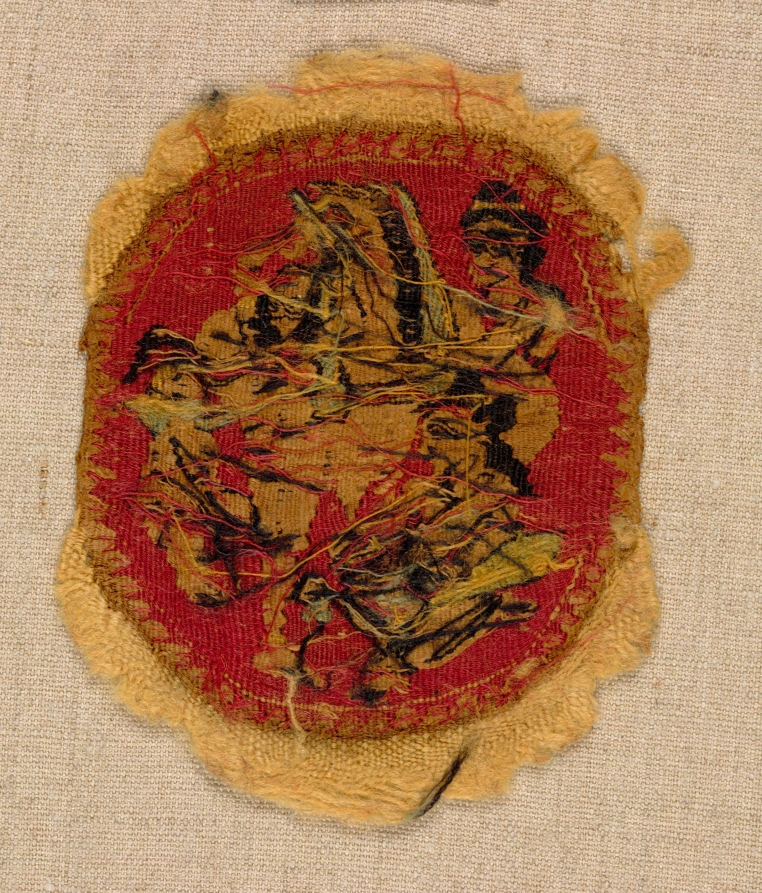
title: Five Round Segmenta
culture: Egypt, Umayyad period (661–750)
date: 650 – 750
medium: tapestry weave: wool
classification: Textile